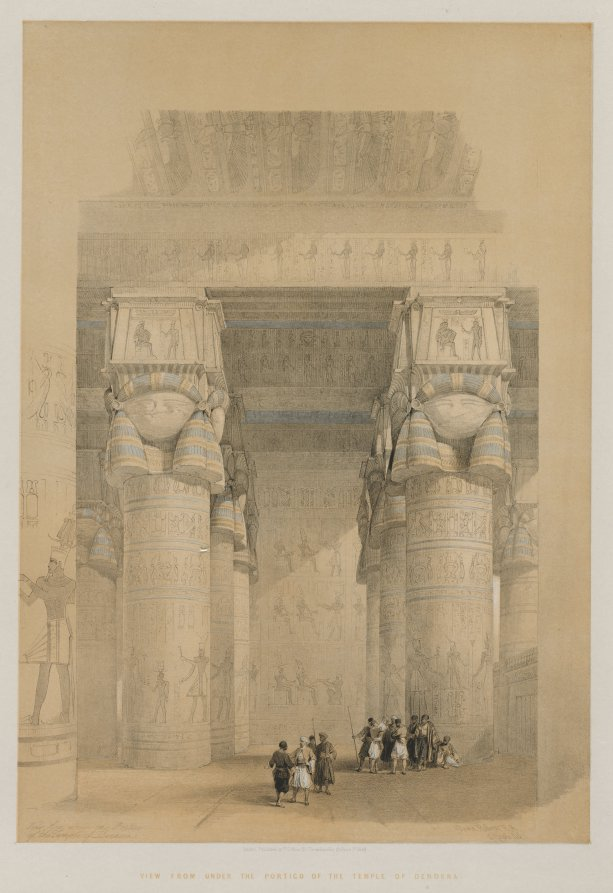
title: Egypt and Nubia, Volume II: View from Under the Portico of the Temple of Dendera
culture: England, 19th century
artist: Louis Haghe (British, 1806–1885)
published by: F. G. Moon, 20 Threadneedle Street, London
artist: after David Roberts (Scottish, 1796–1864)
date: 1849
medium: color lithograph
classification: Print